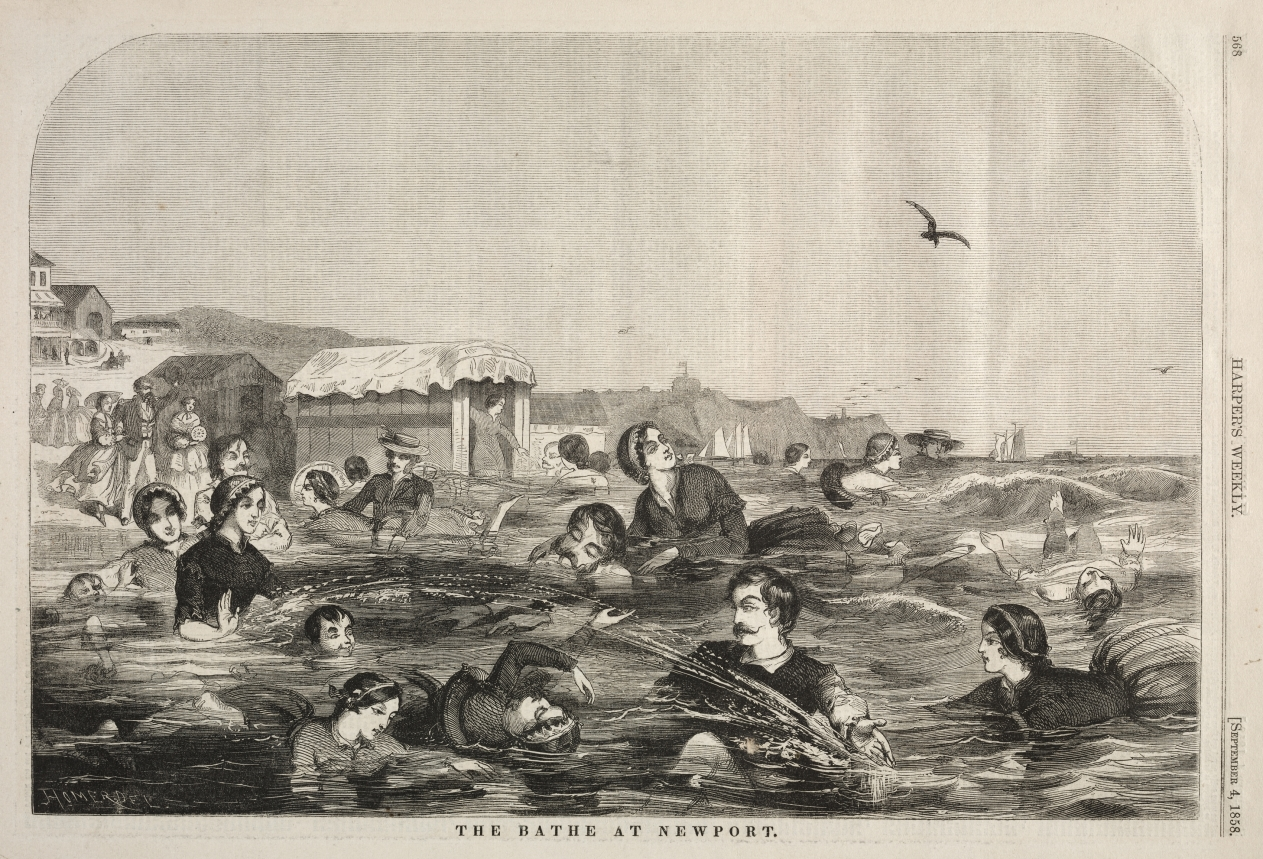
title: The Baths at Newport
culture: America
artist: Winslow Homer (American, 1836–1910)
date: 1858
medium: wood engraving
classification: Print